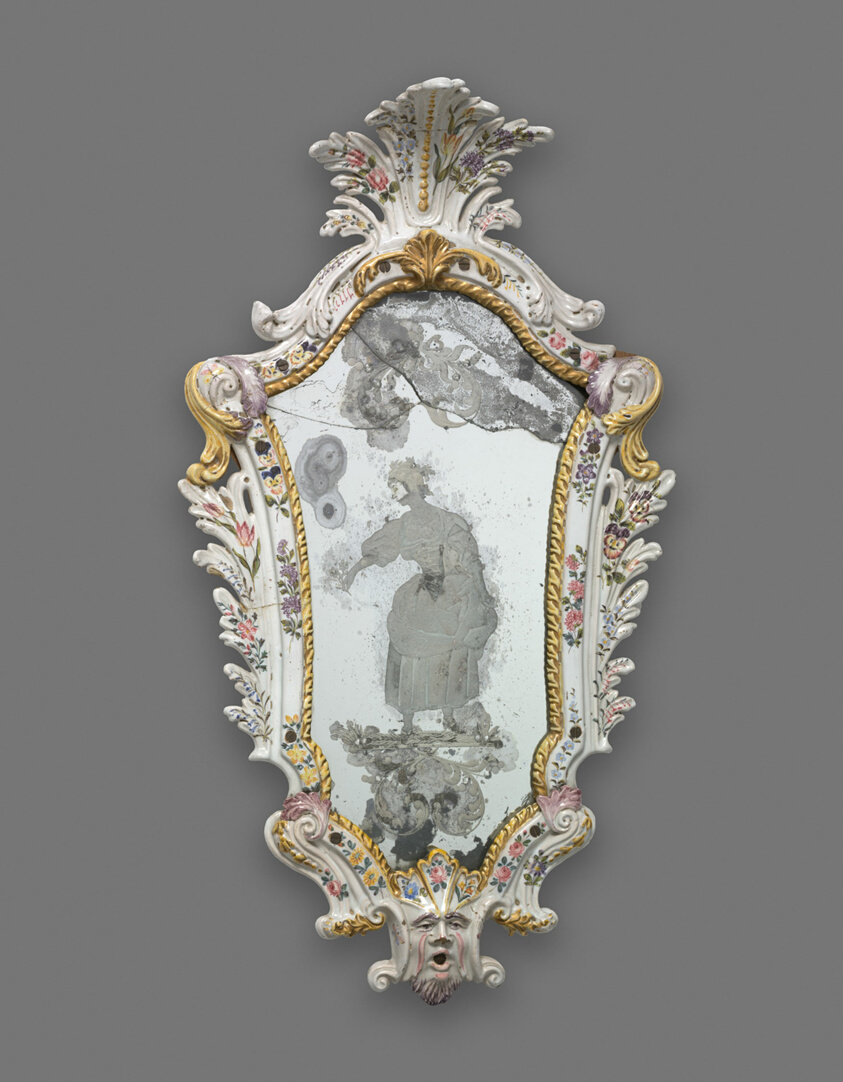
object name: Ceramics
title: Mirror: Shepherdess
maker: Italy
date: 1740/60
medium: Tin-glazed earthenware (faience) and mirror glass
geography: Italy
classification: earthenware; mirror; furniture; ceramics; european decorative arts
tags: furniture